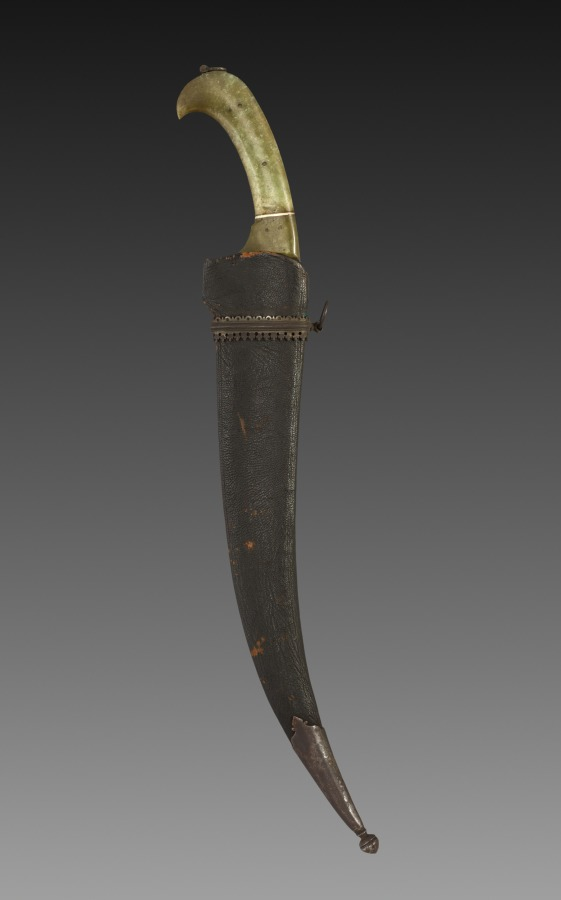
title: Knife with Jade Handle and Scabbard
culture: East India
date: c. 1750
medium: steel and jade, with leather and silver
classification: Arms and Armor